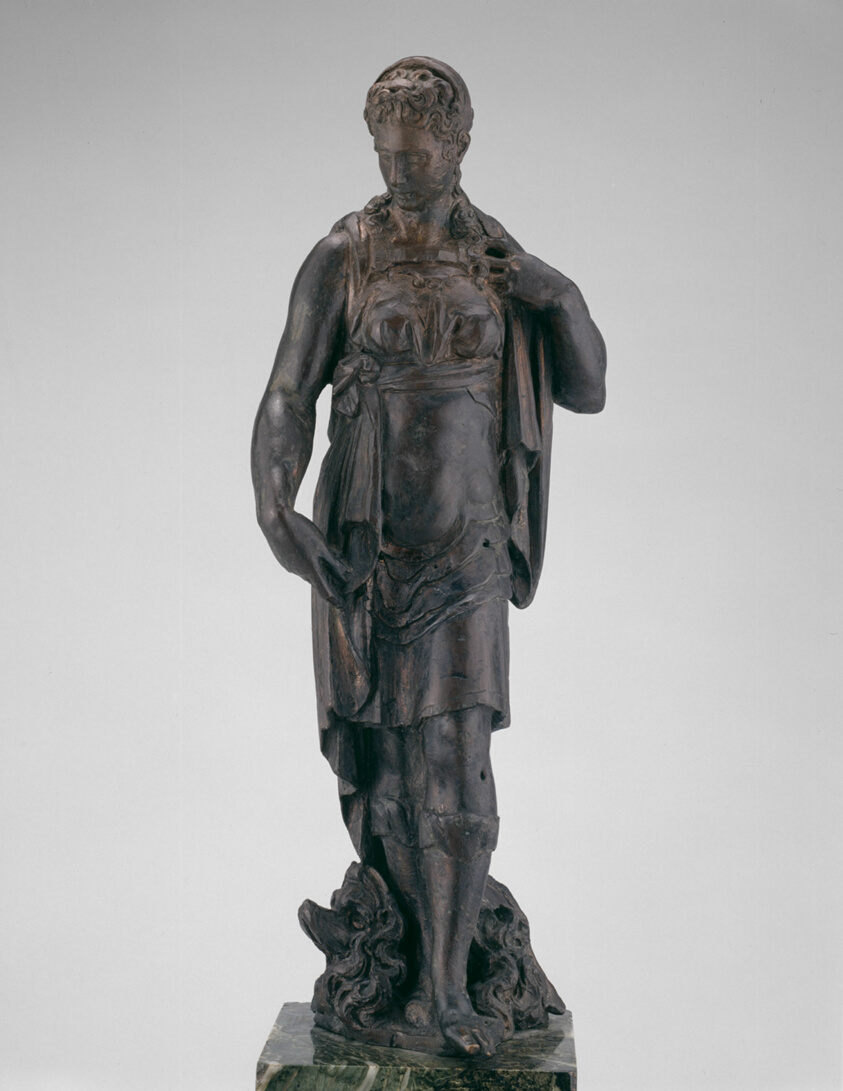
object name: Sculpture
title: Allegorical Figure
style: sixteenth century, 16th Century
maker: Attributed to Bartolomeo Ammanati (Italian, 1511–1592)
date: c. 1540/45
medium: Bronze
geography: Italy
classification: statuette; Italian; bronze; sculpture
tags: figure, person